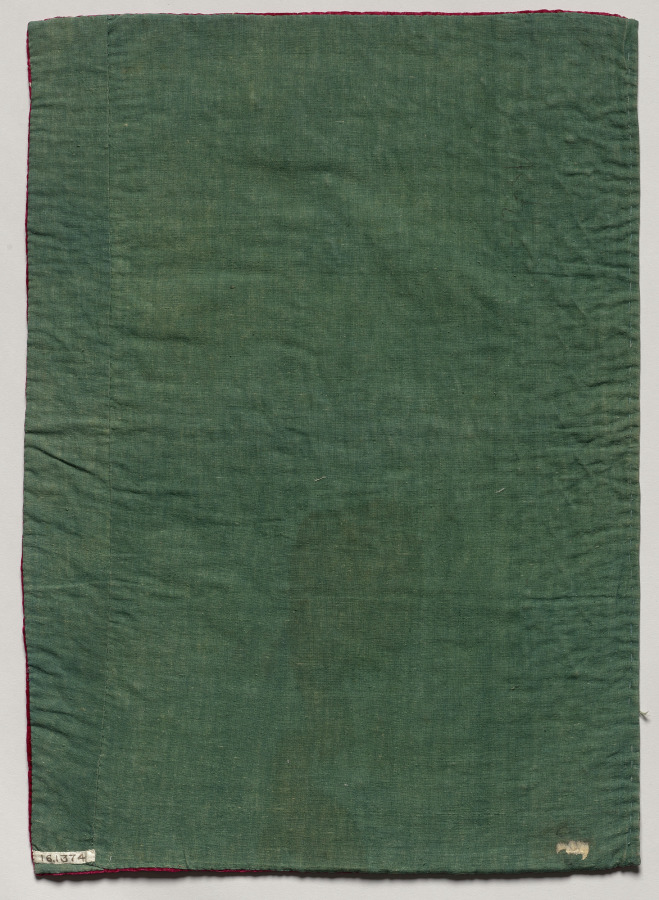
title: Embroidered Velvet Rectangle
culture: India, 19th century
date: 1800s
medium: embroidery; silk and gold filé on linen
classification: Embroidery